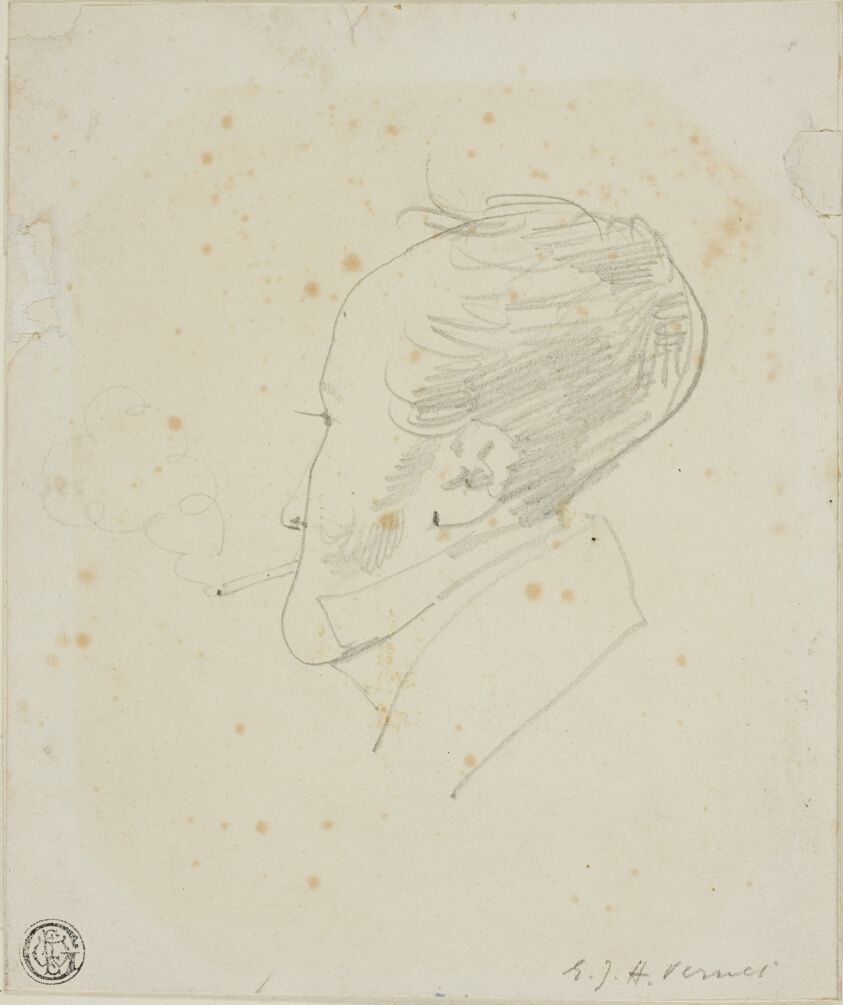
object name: Drawing and Watercolor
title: Self-Portrait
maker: Horace Vernet (French, 1789-1863)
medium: Graphite on ivory wove paper, laid down on cream wove paper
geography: France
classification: graphite; drawings (visual works); prints and drawing